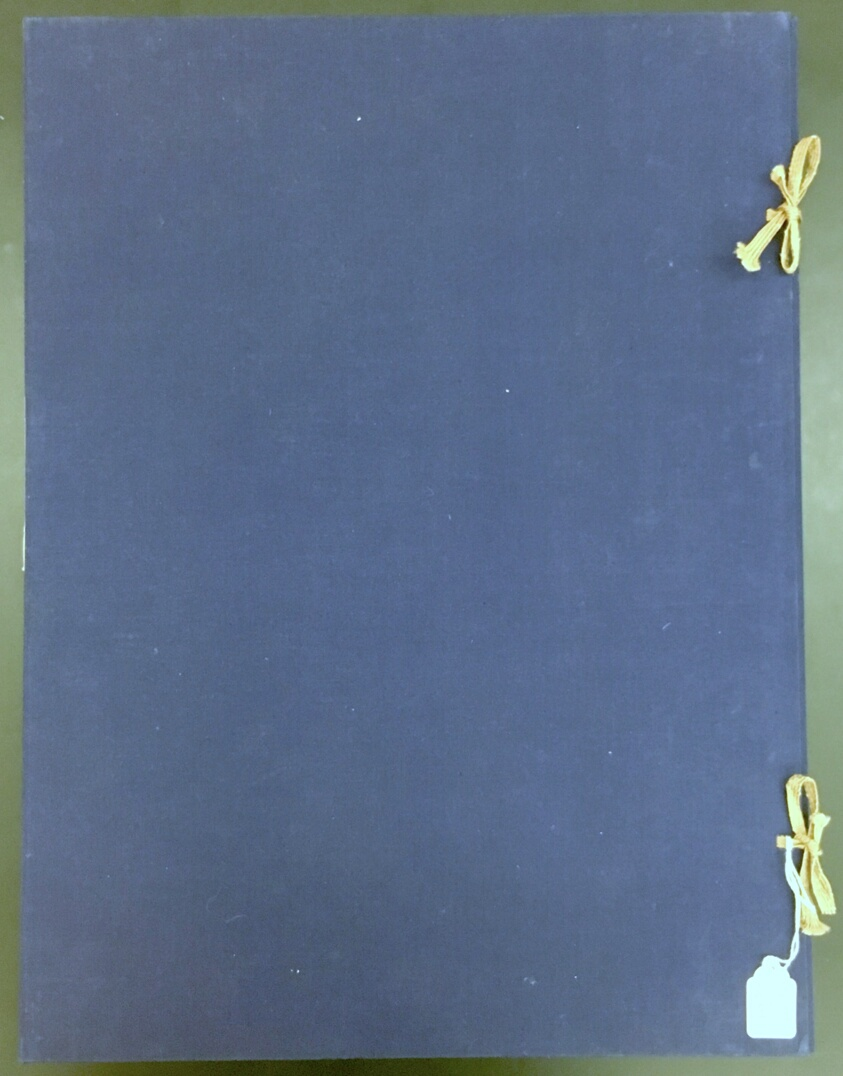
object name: Painting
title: Album Cover for Collection of Ship paintings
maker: China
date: mid 19th century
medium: Album of ten leaves; watercolor on paper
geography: Guangdong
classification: painting; asian art